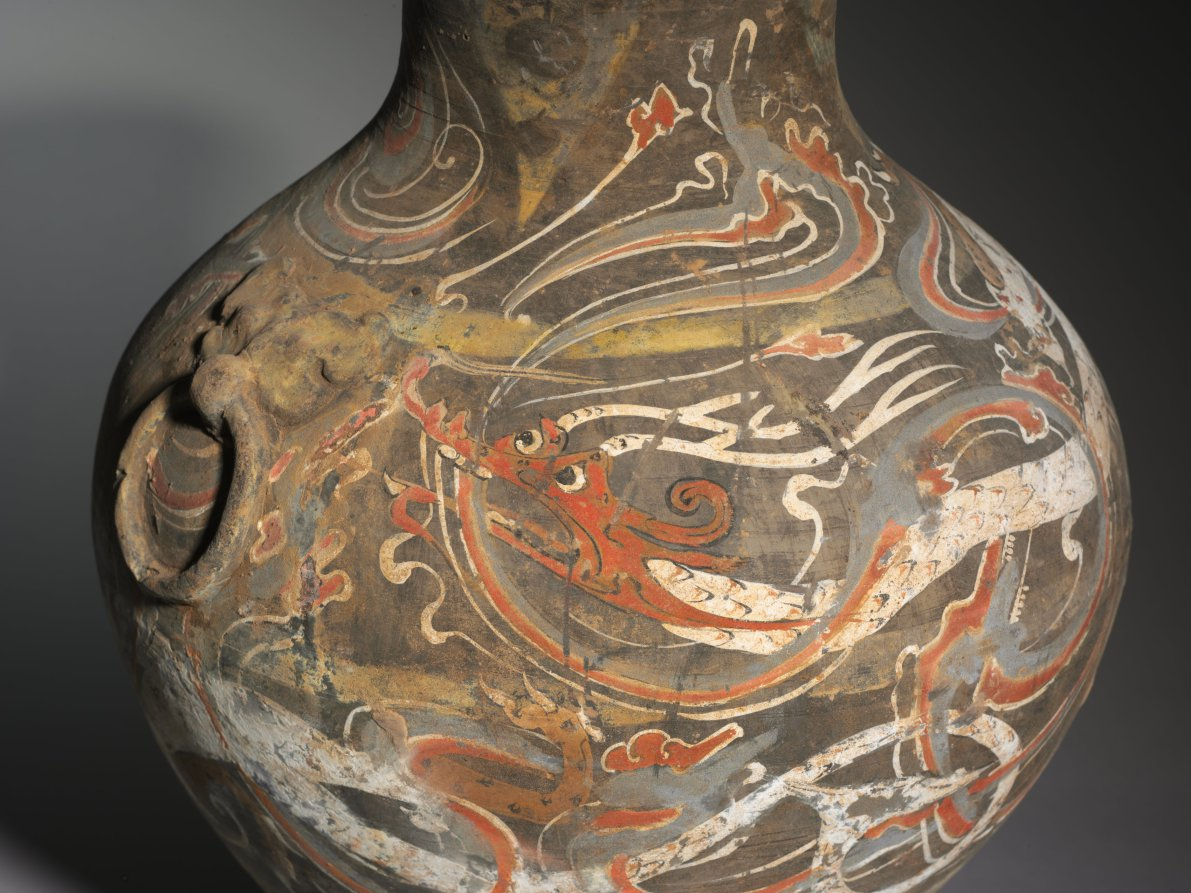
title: Jar (Hu)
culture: China, probably Henan province, Western Han dynasty (206 BCE–8 CE)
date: 202 BCE–9 CE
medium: earthenware with slip and painted decoration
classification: Ceramic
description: Instead of depicting a real landscape, the artist focused on the rhythmic forces of nature and the movement of energy, using the scrolling form as a symbol common to all changes in nature: cloud vapors, waves, and mountains alike. Here a dragon hovers among sweeping scrolls.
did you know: This earthenware wine jar's shape mimics costly bronzes, but the handles have rings that are fixed to the surface of the pot, rendering them useless.